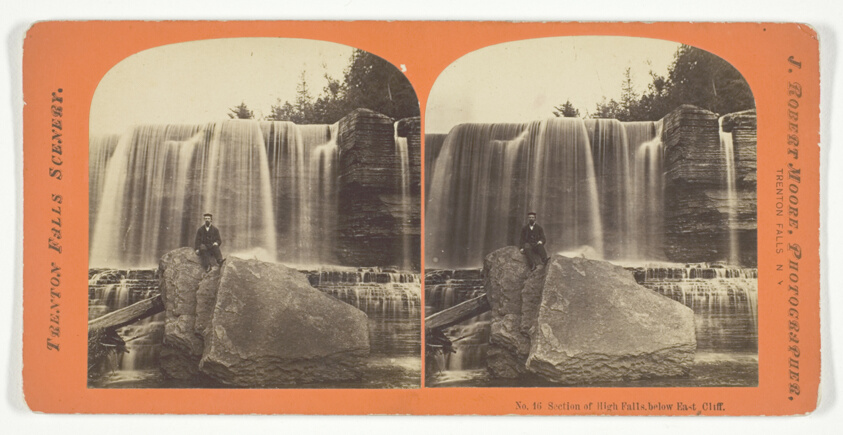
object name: Photograph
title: Section of High Falls. below East Cliff, No. 16 from the series "Trenton Falls Scenery"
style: 19th century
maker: J. Robert Moore (American, active late 19th century)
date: Late 19th century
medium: Albumen print, stereo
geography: New York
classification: photography; photograph; albumen silver print; stereograph (albumen)